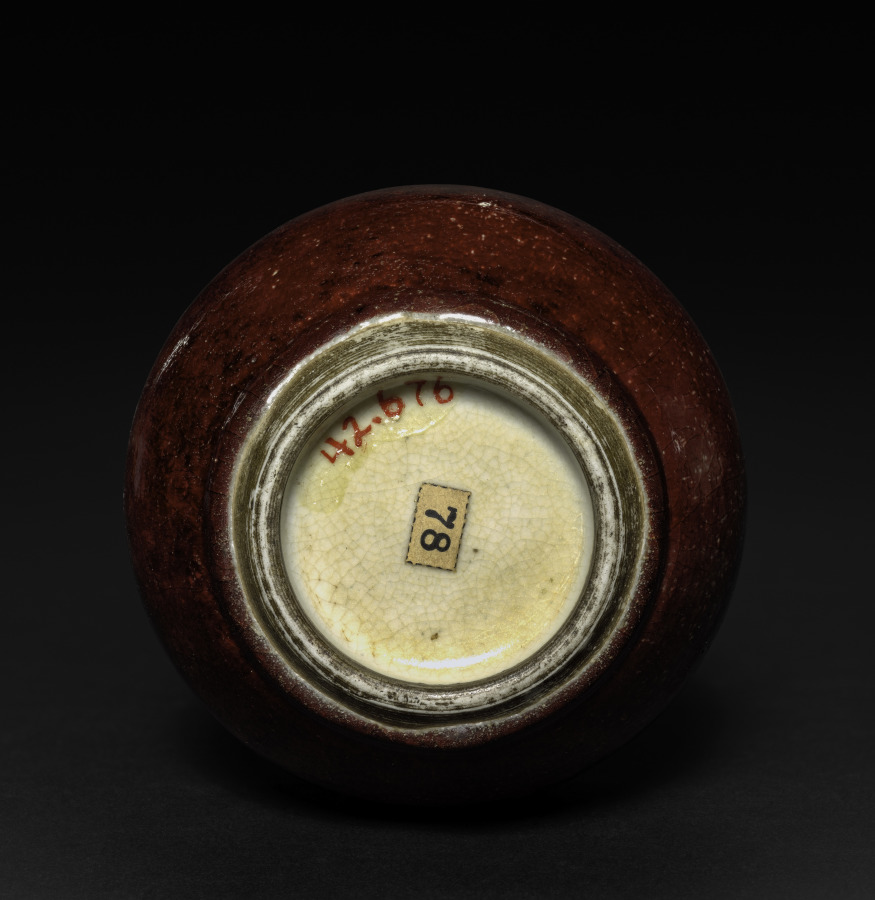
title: Bottle Vase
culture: China, Jingdezhen, Jiangxi province, Qing dynasty (1644–1911), Kangxi reign (1662–1722)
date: 1662–1722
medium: porcelain, Lang ware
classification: Ceramic